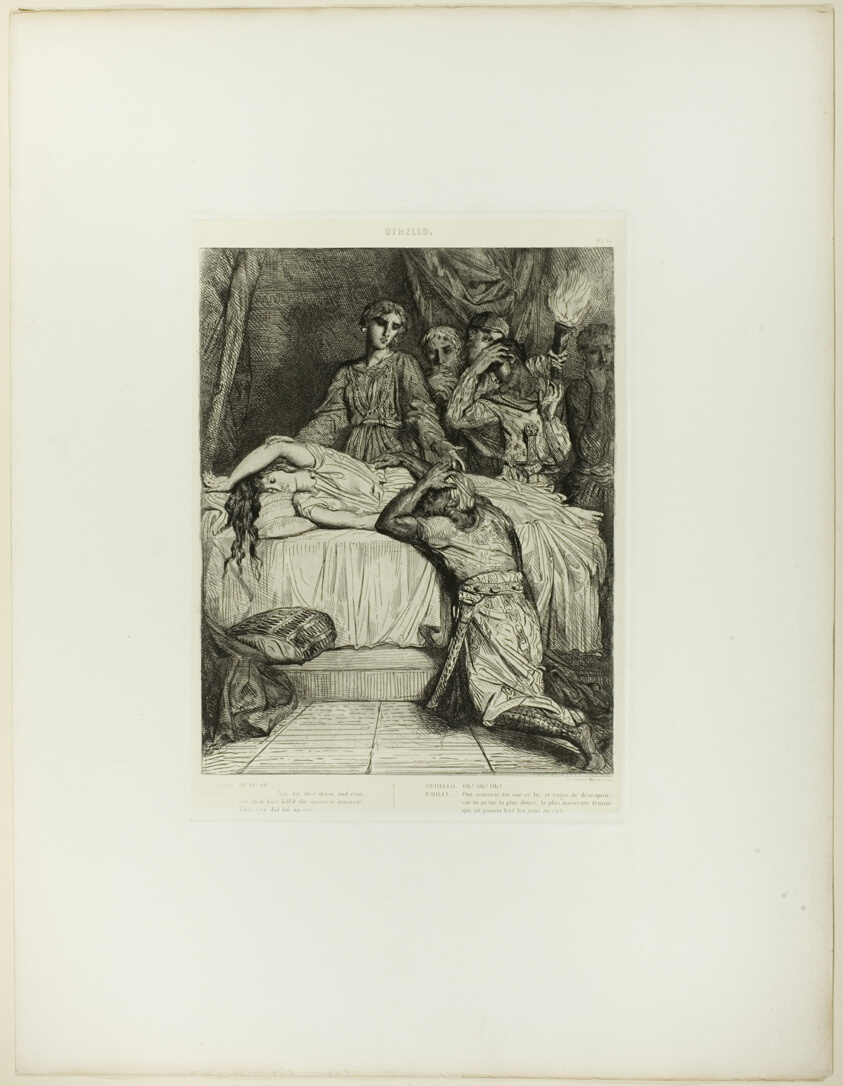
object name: Print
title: Oh! Oh! Oh!, plate fourteen from Othello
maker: Théodore Chassériau (French, 1819-1856)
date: 1844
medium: Etching, engraving and roulette on ivory China paper, laid down on white wove paper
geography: France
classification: etching; print; prints and drawing